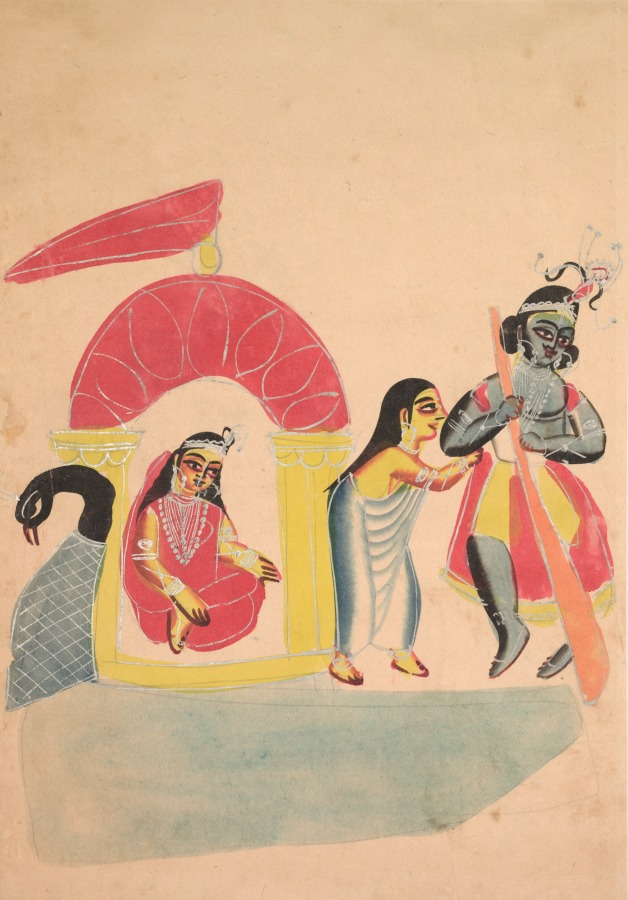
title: Krishna Ferrying Radha Across the Yamuna River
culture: Eastern India, Bengal, Kolkata, Kalighat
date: c. 1890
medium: Gum tempera, graphite, ink, and tin on paper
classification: Painting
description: This image is taken from popular dramas where Krishna, lover of the cowgirls (gopis), disguises himself as a boatman to ferry a demure Radha, his favorite gopi. It depicts devotion and the intensity of separated lovers. The painting includes an image of another woman, dressed in white with shorn hair, possibly a widow. Krishna is portrayed as sporting a mustache and has a Prince Albert hairstyle.